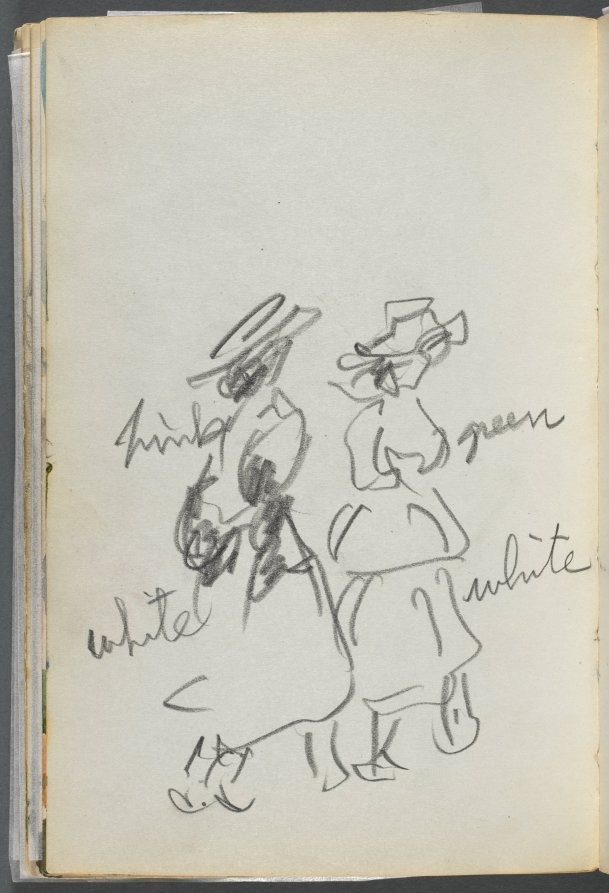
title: Sketchbook, The Dells, N° 127, page 144: Two Figures walking with color notations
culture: America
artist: Maurice Prendergast (American, born Newfoundland [now Canada], 1858–1924)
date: c. 1919–1921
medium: graphite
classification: Bound Volume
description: This sketchbook contains 59 pages of graphite drawings and 16 watercolors made at various locations on Cape Ann, Massachusetts.